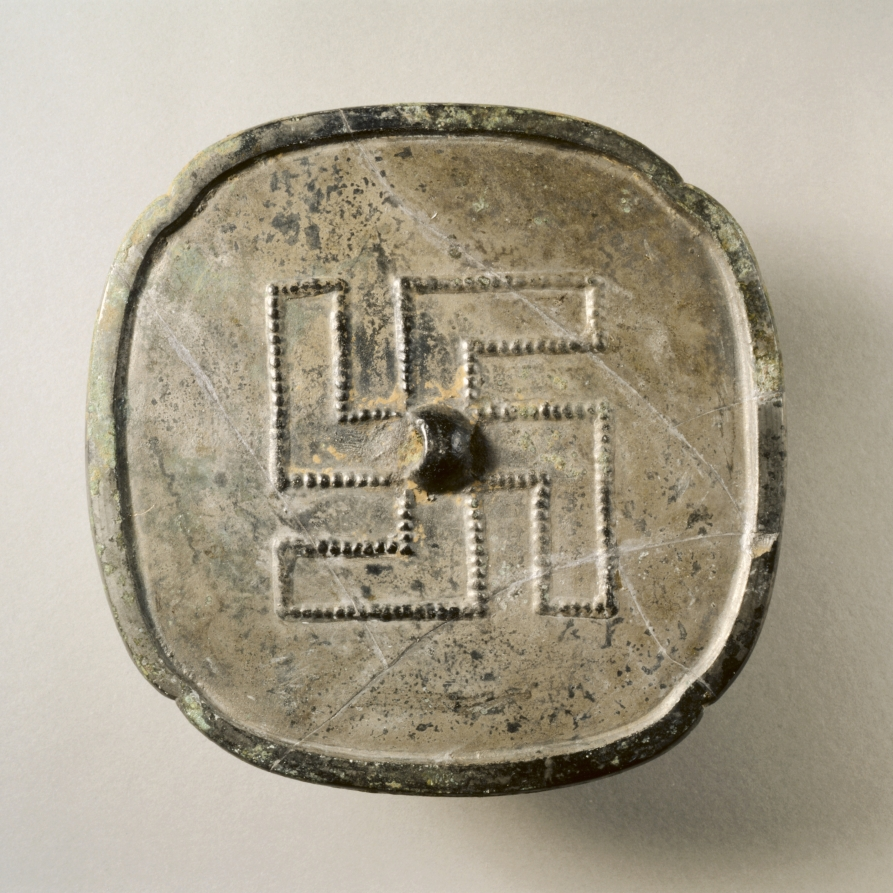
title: Quadrilobed Mirror with Wan Symbol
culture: China, Tang dynasty (618-907)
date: 700s-800s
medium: bronze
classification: Metalwork